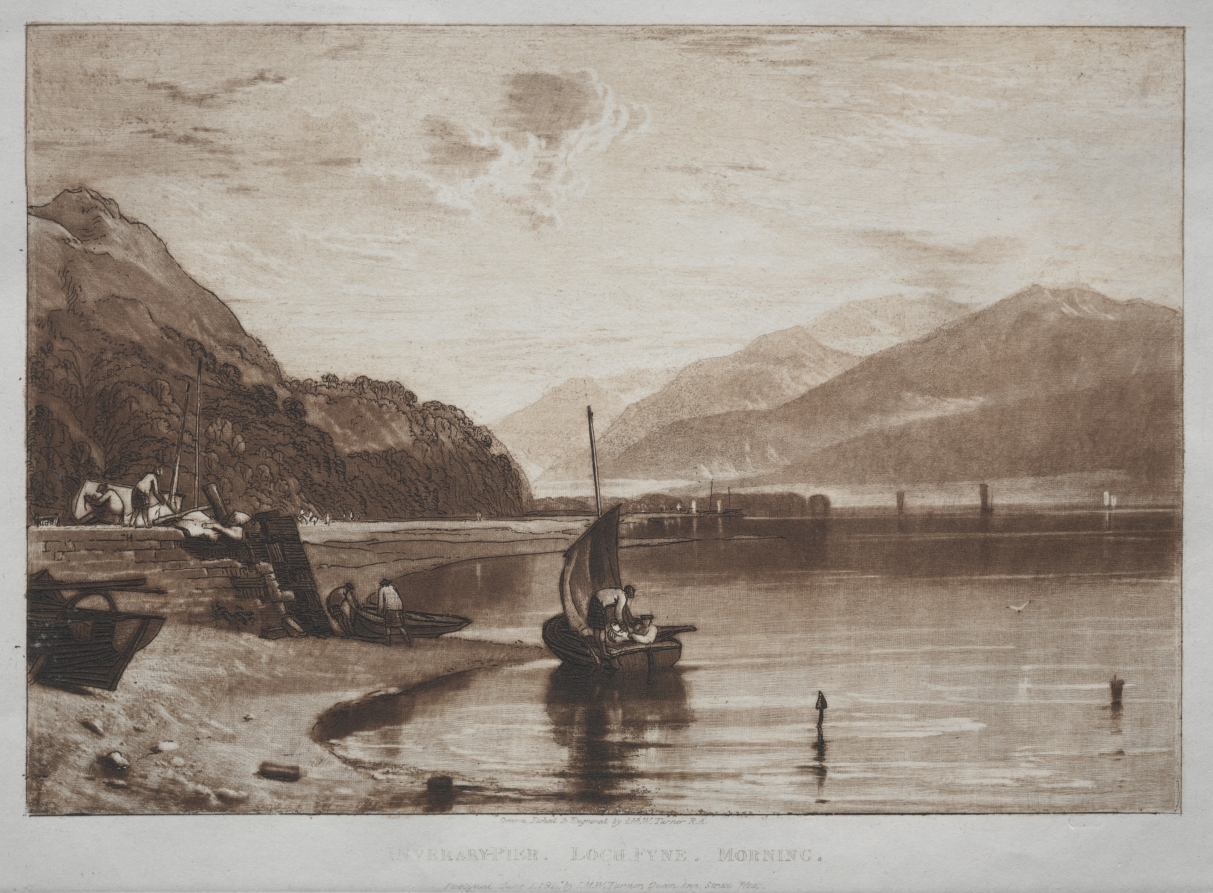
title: Liber Studiorum: Inverary Pier, Lock Fyne, Morning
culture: England, 19th century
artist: Joseph Mallord William Turner (British, 1775–1851)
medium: etching and mezzotint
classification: Print